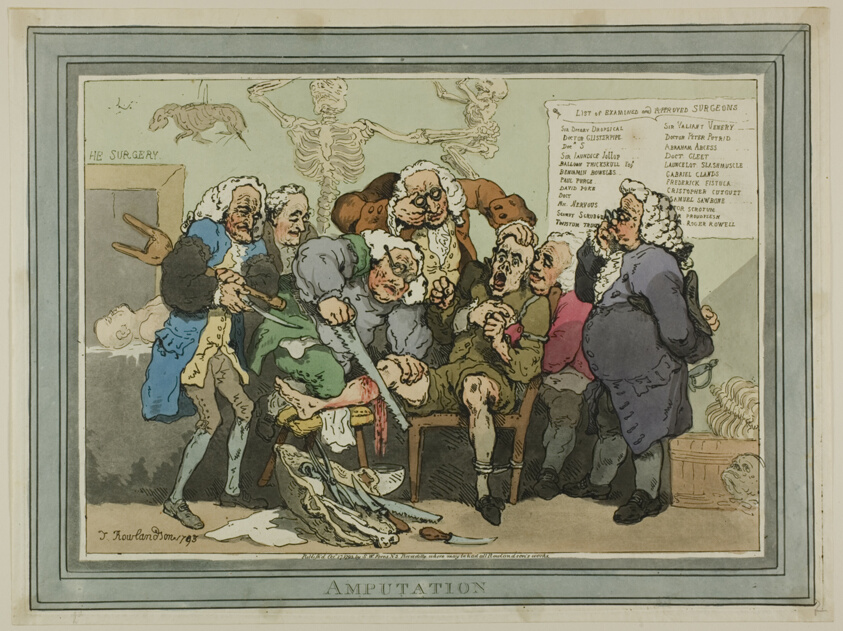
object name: Print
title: Amputation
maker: Thomas Rowlandson (English, 1756-1827); Published by S.W. Fores (English, 1761-1838)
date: published October 17, 1793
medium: Hand-colored etching on ivory wove paper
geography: England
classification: etching; print; prints and drawing